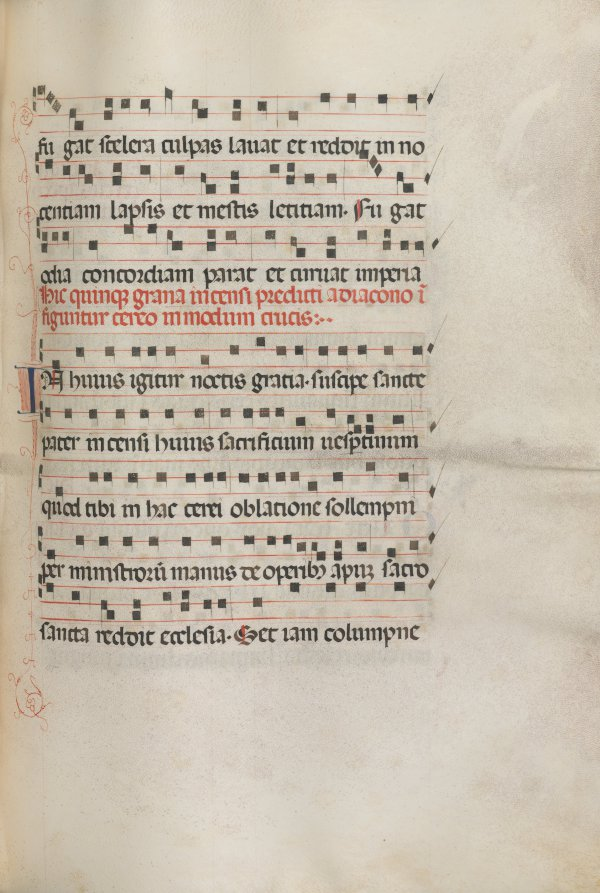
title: Missale: Fol. 156: Music for "Exultet"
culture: Italy, Perugia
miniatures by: Bartolommeo Caporali (Italian, c. 1420–1503)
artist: assisted by Giapeco Caporali (Italian, d. 1478)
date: 1469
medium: ink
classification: Bound Volume